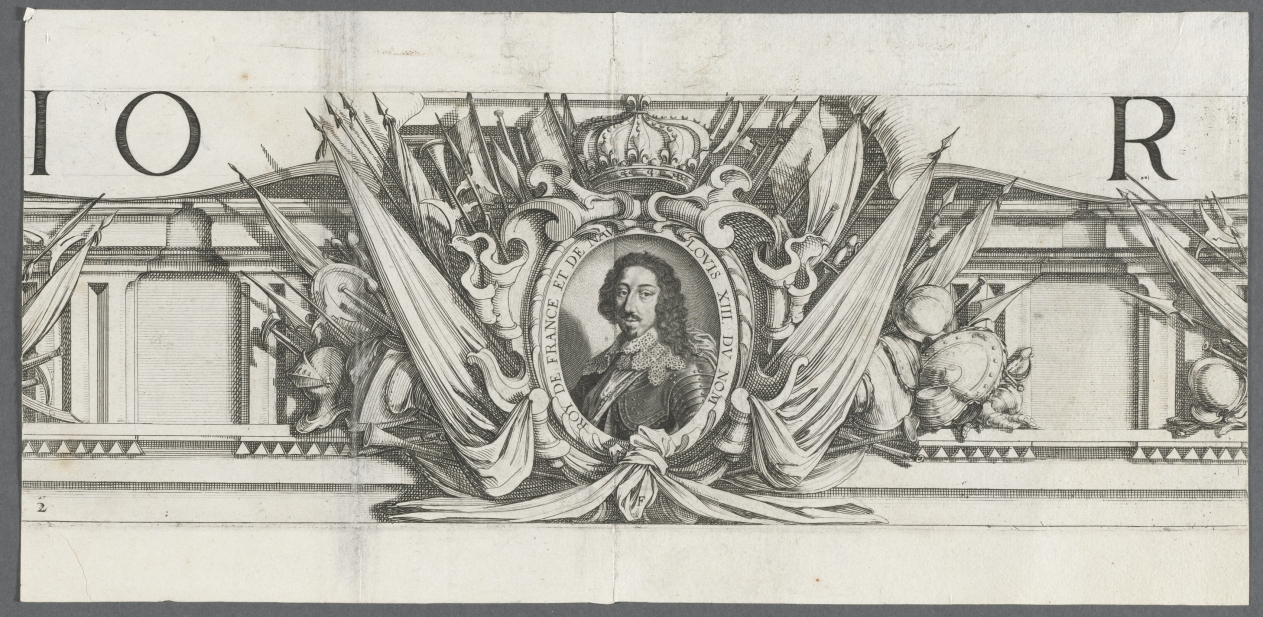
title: The Siege of La Rochelle: Plate 2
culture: France, 17th century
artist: Michael Lasne (French, 1590–1667)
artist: and Abraham Bosse (French, 1602–1676)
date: 1628–1630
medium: etching and engraving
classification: Print